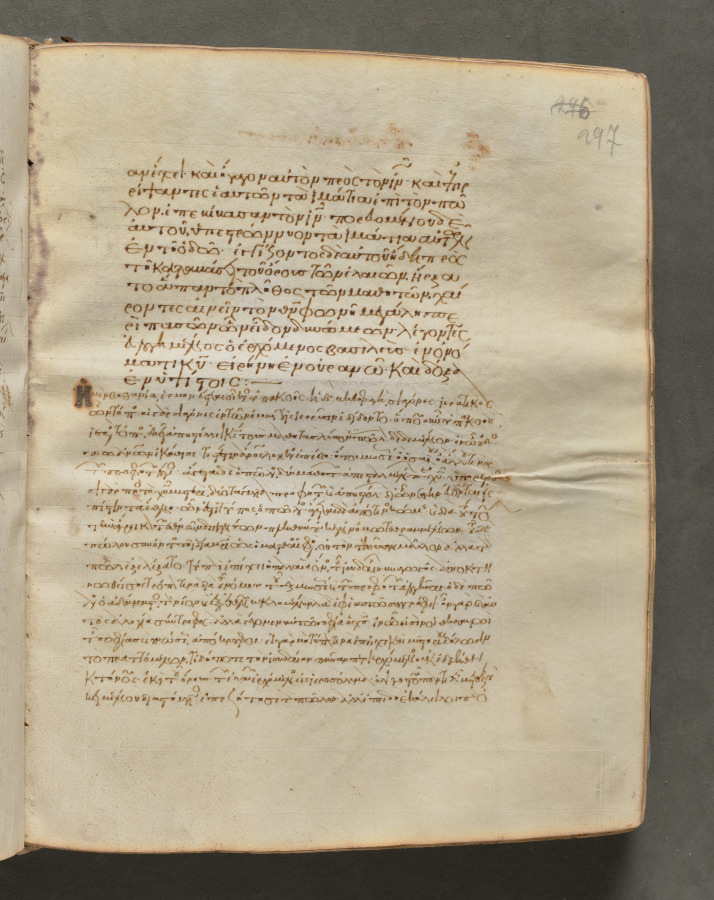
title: Text, folio 297 (recto), from a Gospel Book with Commentaries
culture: Byzantium, Constantinople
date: c. 1000–1100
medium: ink, tempera, and gold on vellum; leather binding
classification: Bound Volume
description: Each of the four gospels in this book opens on a page with brilliantly illuminated borders depicting the author of the text as well as birds—principally peacocks, symbols of the immortality of the soul—and fountains, representing the fountain of life and the salvation of the soul. This volume consists of 428 leaves with texts in Greek. Its level of sophistication suggests that it was probably written and decorated in a monastery in Constantinople.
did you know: Gospel books were carried in procession through Byzantine churches.